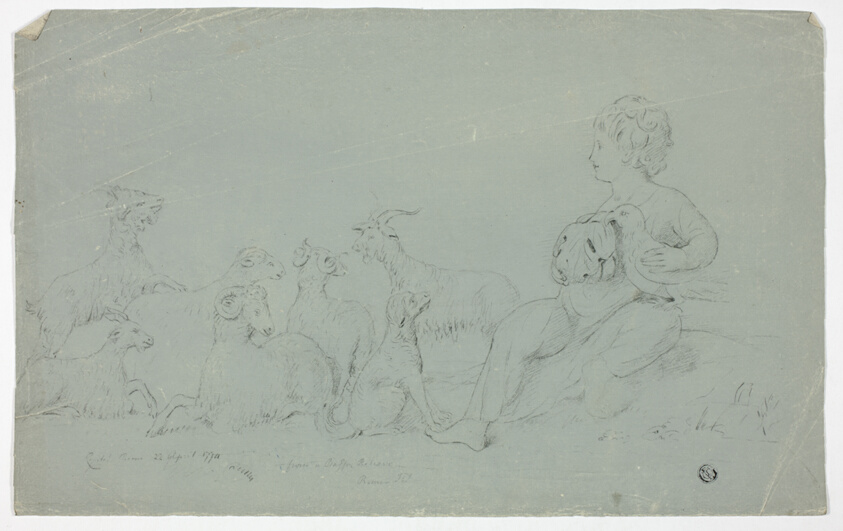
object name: Drawing and Watercolor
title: Antique Bas-Relief with Seated Boy Holding Falcon and Accompanied by Dog, Sheep, and Goats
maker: John Downman (English, 1750-1824)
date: 1774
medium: Black crayon on ivory laid paper prepared with a pale blue ground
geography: England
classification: chalk; drawings (visual works); prints and drawing